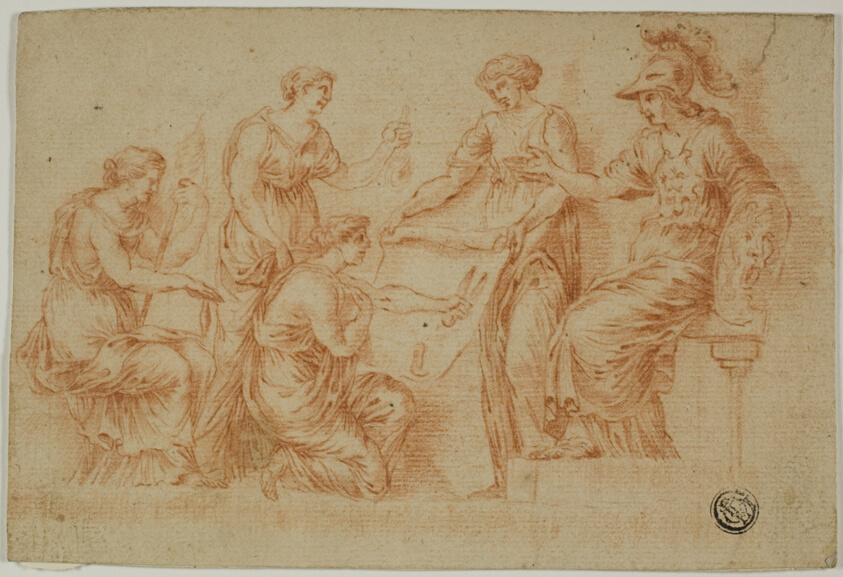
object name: Drawing and Watercolor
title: Pallas Athena and the Three Fates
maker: Unknown Artist; French, 18th century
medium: Red chalk, on tan laid paper, laid down on cream laid paper, tipped on ivory laid paper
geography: France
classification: chalk; drawings (visual works); prints and drawing